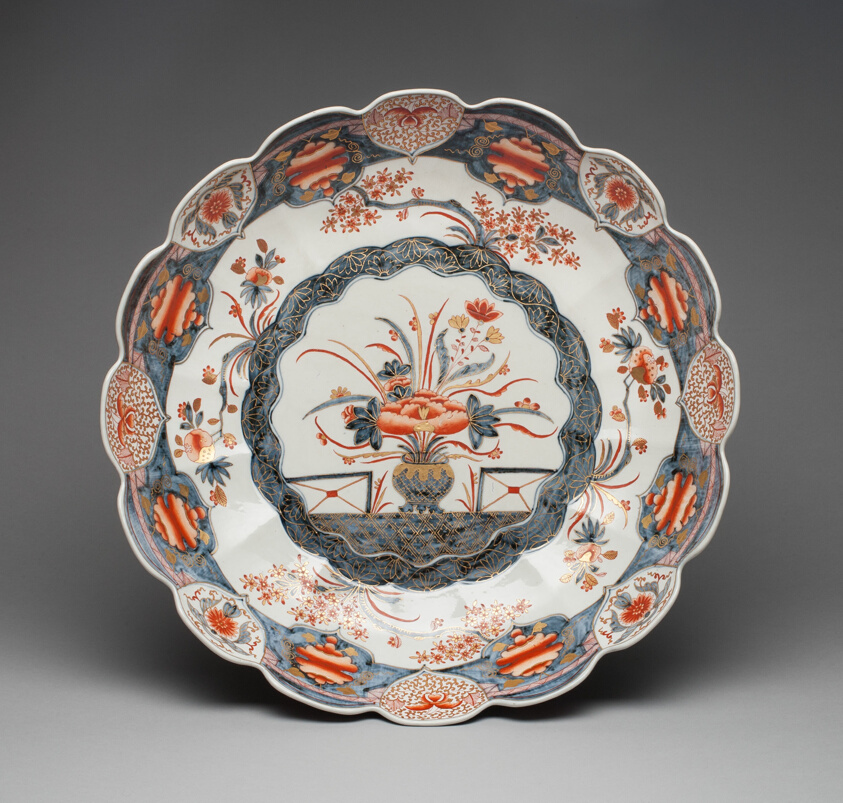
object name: Ceramics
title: Dish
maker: Du Paquier Porcelain Manufactory (Austrian, 1718–1744)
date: 1725–30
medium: Hard-paste porcelain, underglaze blue, iron red enamel, and gilding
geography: Vienna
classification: dish (vessel); porcelain; ceramics; european decorative arts